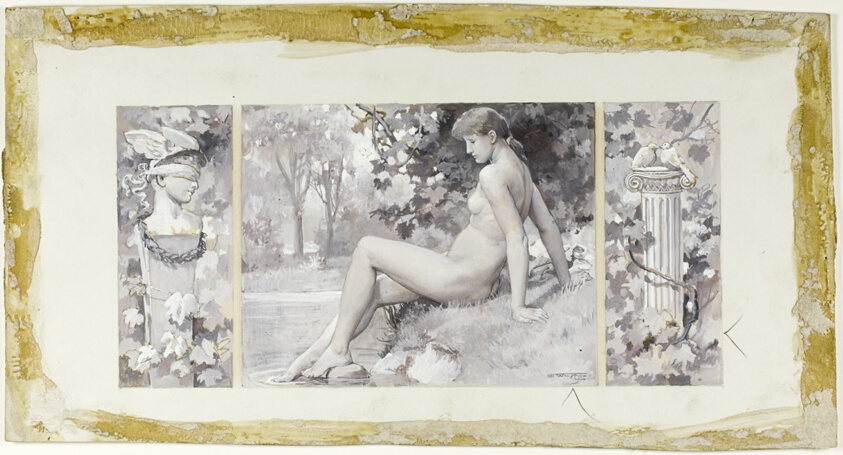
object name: Drawing and Watercolor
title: She Bathes Unseen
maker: Will Hicock Low (American, 1853-1932)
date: 1885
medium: Gray and white gouache, over traces of black crayon, on cream wove card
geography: United States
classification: drawings (visual works); prints and drawing